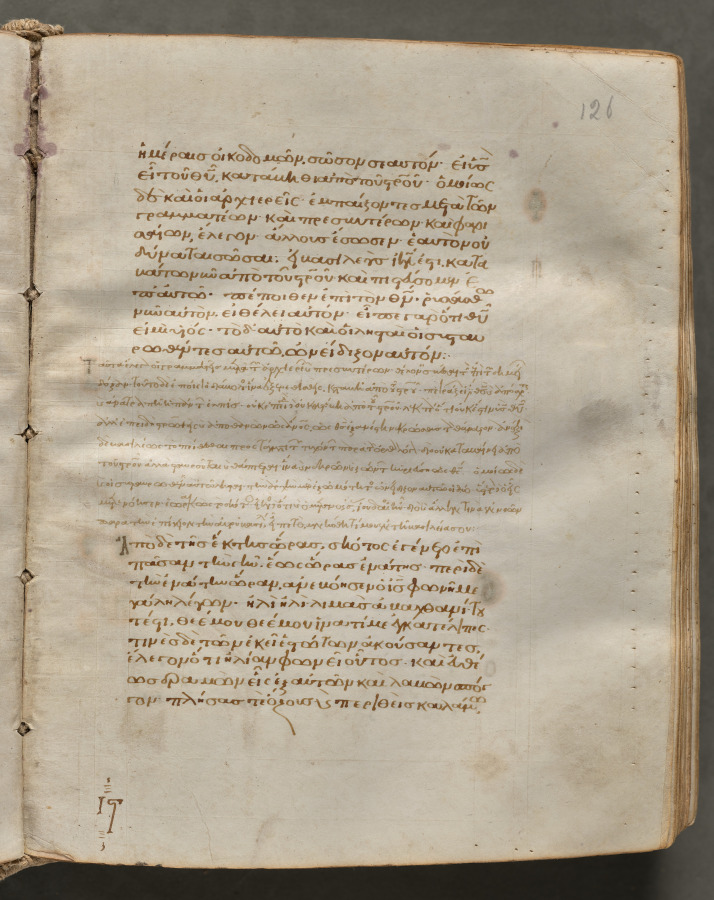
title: Text, folio 126 (recto), from a Gospel Book with Commentaries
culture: Byzantium, Constantinople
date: c. 1000–1100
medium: ink, tempera, and gold on vellum; leather binding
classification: Bound Volume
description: Each of the four gospels in this book opens on a page with brilliantly illuminated borders depicting the author of the text as well as birds-principally peacocks, symbols of the immortality of the soul-and fountains, representing the fountain of life and the salvation of the soul. This volume consists of 428 leaves with texts in Greek. Its level of sophistication suggests that it was probably written and decorated in a monastery in Constantinople.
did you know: Gospel Books were carried in procession through Byzantine churches.